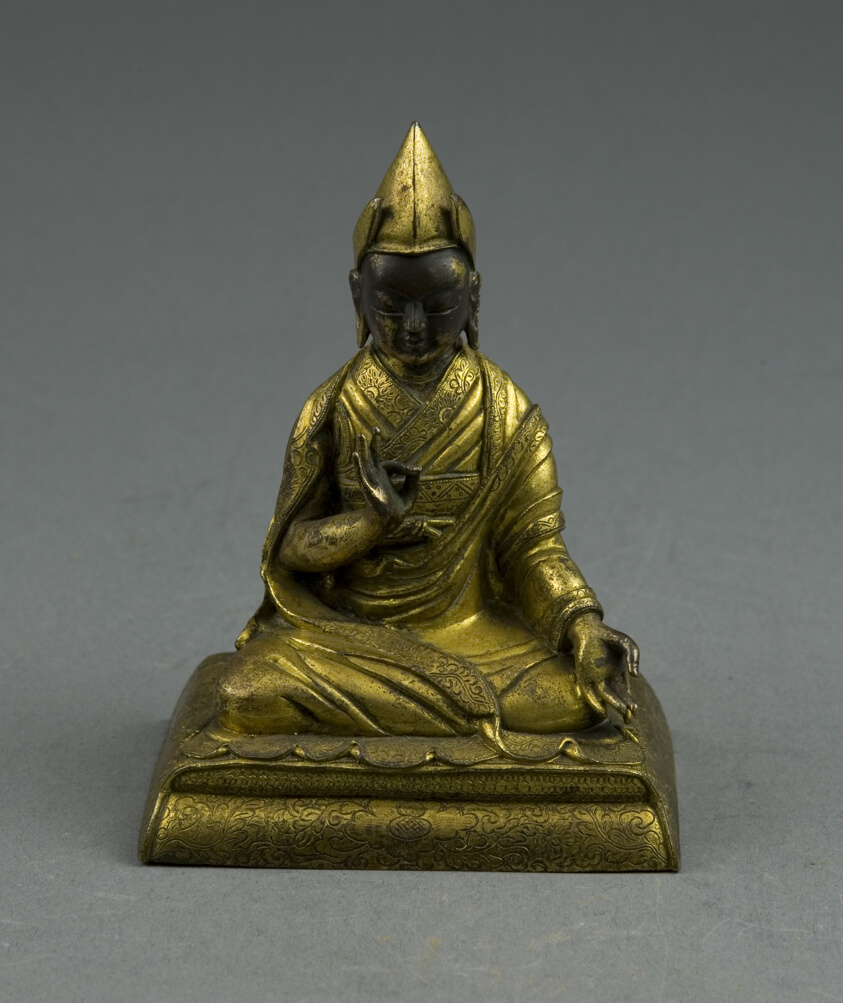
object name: Sculpture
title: Portrait of a Seated Mongolian Lama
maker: China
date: Qing dynasty (1644–1911)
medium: Gilt bronze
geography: China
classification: bronze; metal; sculpture; asian art